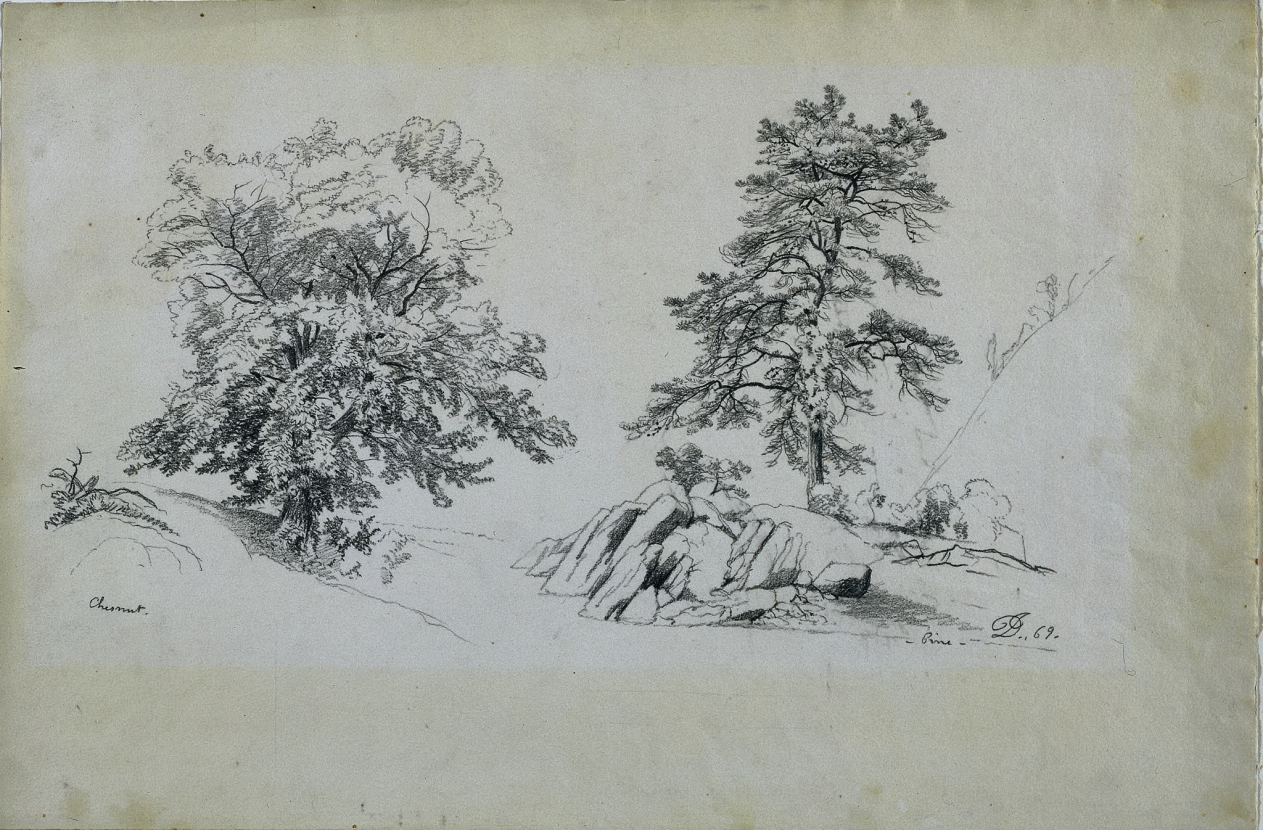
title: Chestnut and Pine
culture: America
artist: David Johnson (American, 1827–1908)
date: 1869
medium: graphite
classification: Drawing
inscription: signed, lower right, in graphite: DJ. [artist monogram] 69. ; by artist, lower left, in graphite: Chesnut. ; by artist, lower right, in graphite: -Pine- ; VERSO, upper left, in graphite: 150 ; lower right, in graphite: 150. 17035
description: Primarily self-taught, Johnson’s only formal training was a few lessons with Jasper F. Cropsey (also in this gallery). Johnson was, however, a devoted student of nature. As was typical of artists of the Hudson River school, he constructed his paintings in the studio with the aid of detailed drawings he had made directly from nature. Probably drawn in the White Mountains of New Hampshire, this sheet pairs two distinct species of tree--a pine and a chestnut--in a harmonious composition.